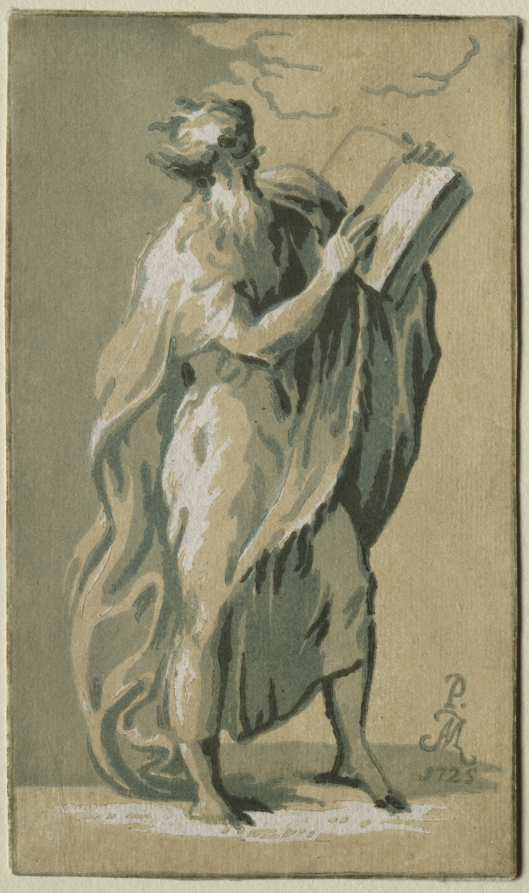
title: An Old Man Standing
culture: Italy, 18th century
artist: Antonio Maria I Zanetti (Italian, 1680–1757)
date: 1725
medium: chiaroscuro woodcut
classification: Print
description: A native of Venice, artist, and collector, Zanetti also acted as an agent, arranging sales and commissions since he knew both the leading artists and the most influential patrons. In 1720, while visiting England, Zanetti acquired a group of 130 drawings executed by Parmigianino, many of which were initially done as models for chiaroscuro woodcuts. Zanetti made his own chiaroscuros after these sheets, helping to revive the medium in the 18th century. Since Zanetti was primarily a copyist, his originality is found not so much in his compositions as in his technique. Previously, chiaroscuro printmakers had used several shades of a single subdued color to imitate the effect of wash in monochromatic drawings. Zanetti, however, experimented with using different colors within a single print and, influenced by the rococo paintings of his day, chose contrasting bright pastels.